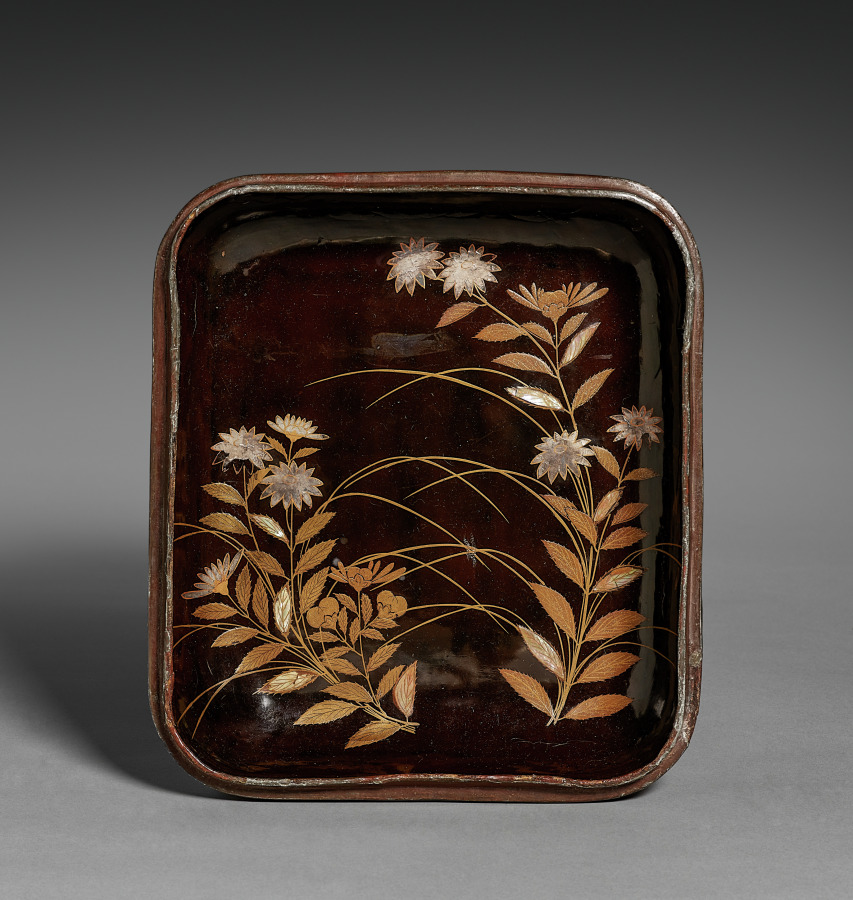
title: Letter Box (base)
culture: Japan, Edo period (1615–1868)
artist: manner of Ogata Kōrin (Japanese, 1658–1716)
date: 1700s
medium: lacquer with pewter and mother-of-pearl inlay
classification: Lacquer